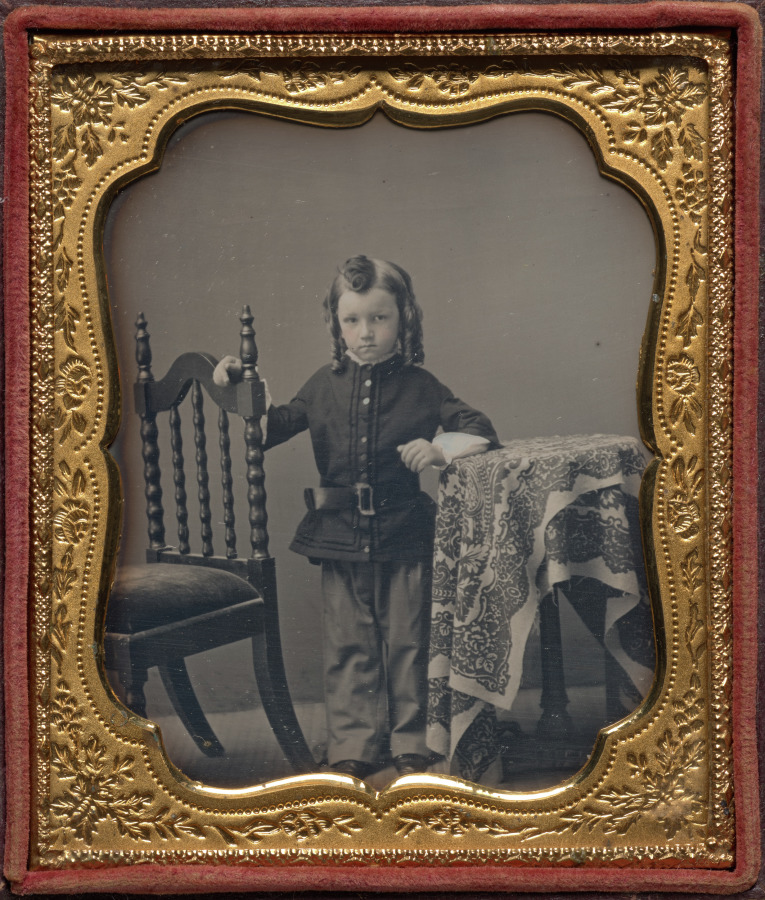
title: Standing boy with bottle curls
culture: America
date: c. 1853–54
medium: daguerreotype, sixth plate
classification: Photograph